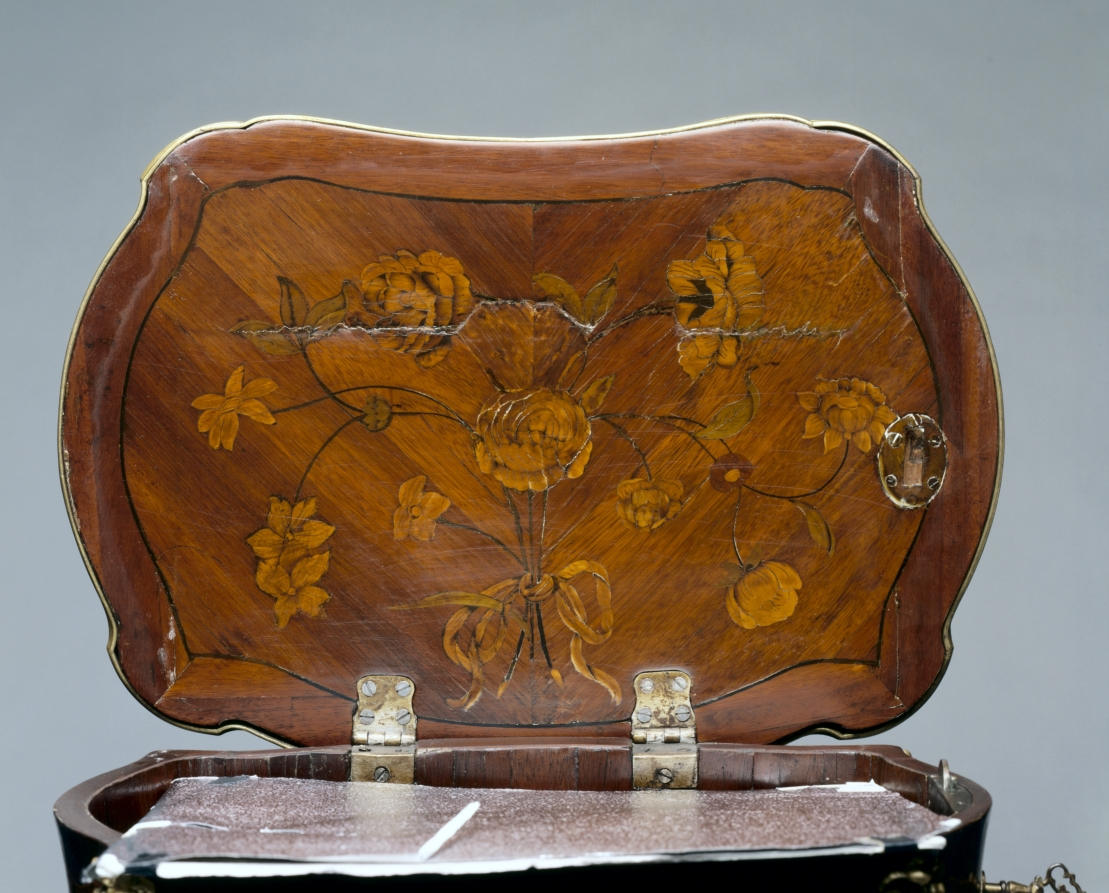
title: Work Table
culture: France, Paris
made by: Bernard Peridiez (French, d. 1757)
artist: or Gerard Peridiez (French, born c.1730)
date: 1700–1799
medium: wood marquetry with gilt bronze mounts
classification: Furniture and woodwork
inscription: signed under shelf: B. Peridiez JNE.